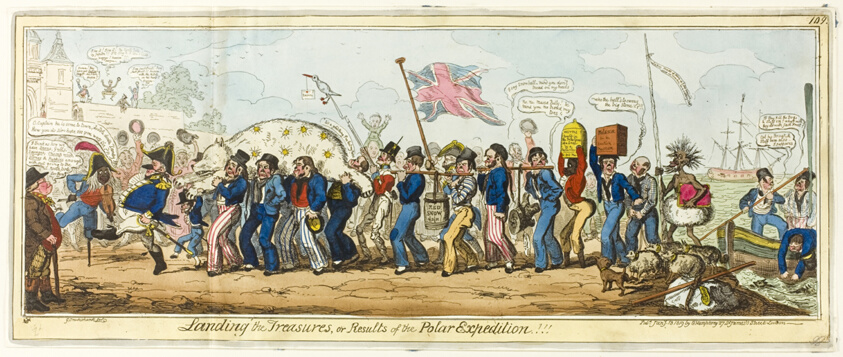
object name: Print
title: Landing the Treasures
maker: George Cruikshank (English, 1792-1878); after Captain Frederick Marryat (English, 1792-1848); published by George Humphrey (English, c. 1773-1831)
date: published January 18, 1819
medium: Hand-colored etching on paper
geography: England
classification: etching; print; prints and drawing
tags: dogs, animals